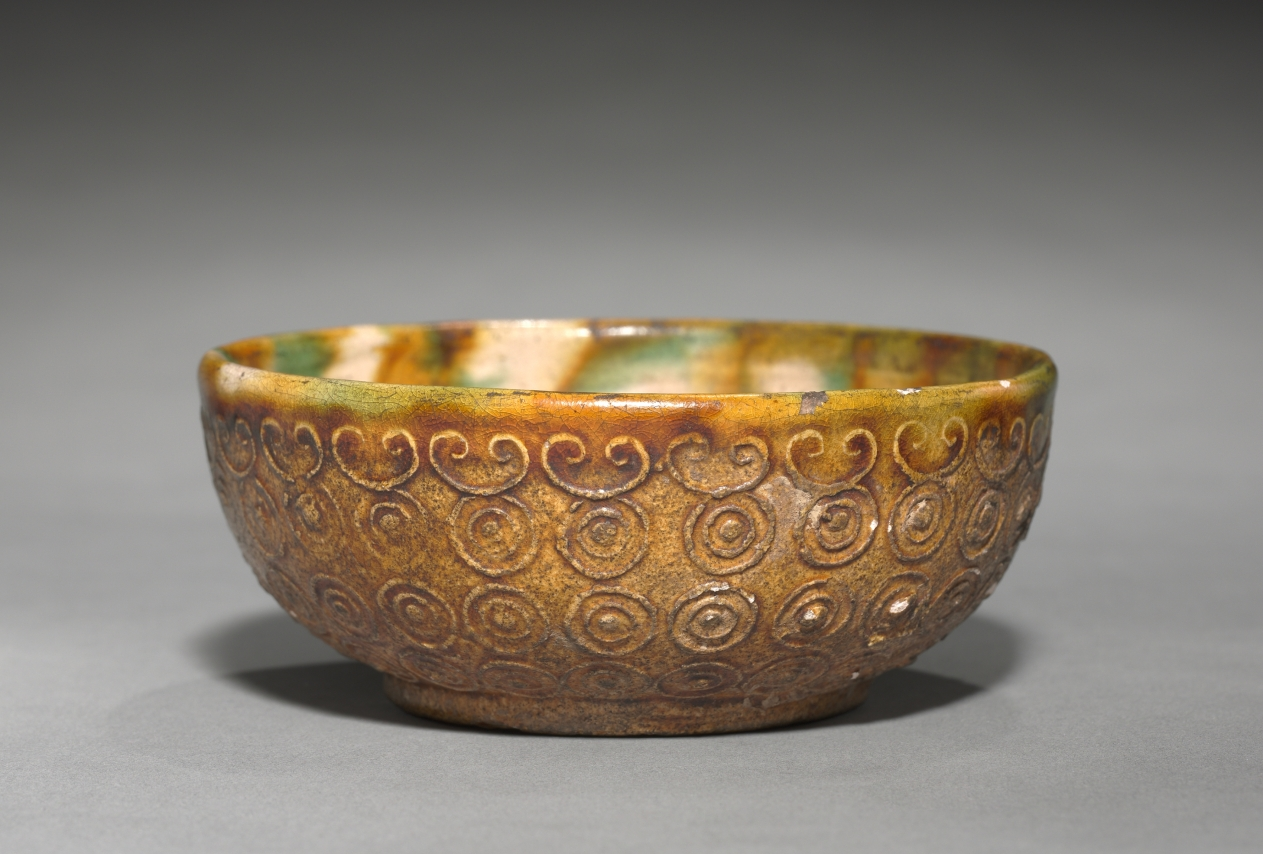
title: Bowl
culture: China, Tang dynasty (618-907)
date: 618–906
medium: glazed earthenware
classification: Ceramic